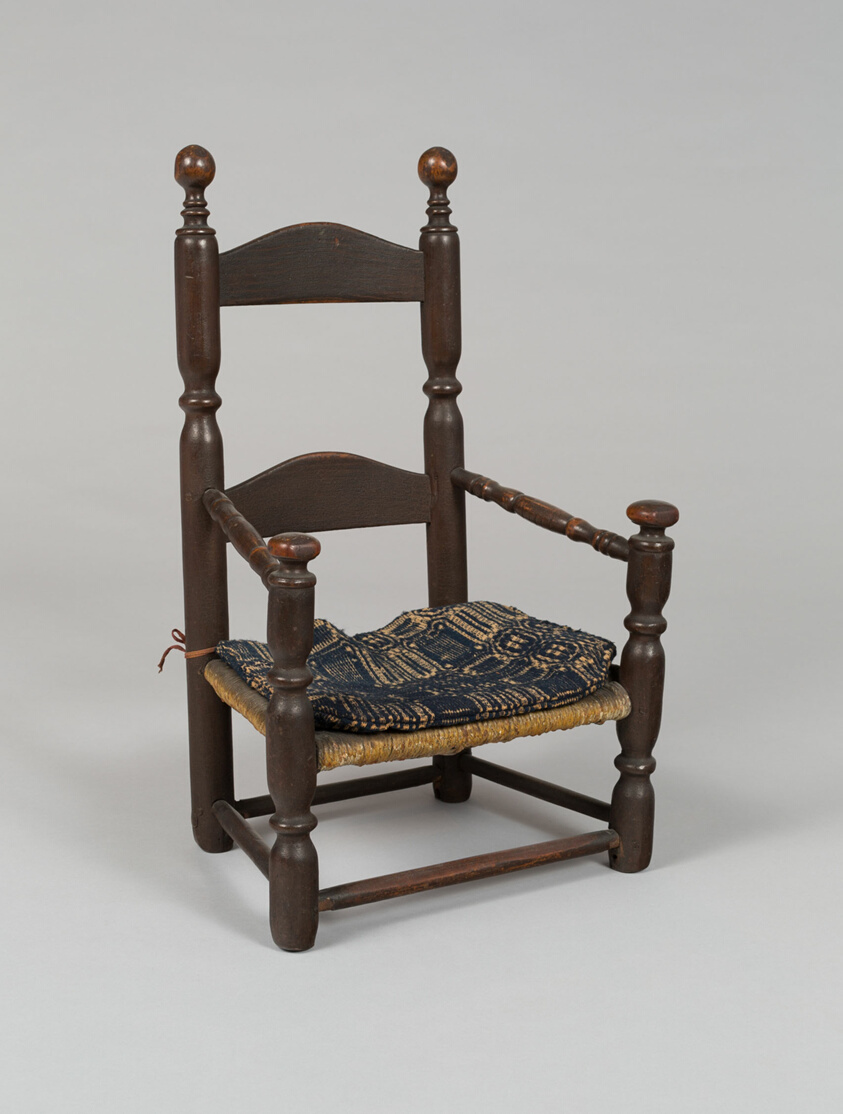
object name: Furniture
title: Child's Armchair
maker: Artist unknown (American, 17th–18th century)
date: 1690–1710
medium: Maple and upholstery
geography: United States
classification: seating; furniture; american decorative arts; american arts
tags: furniture